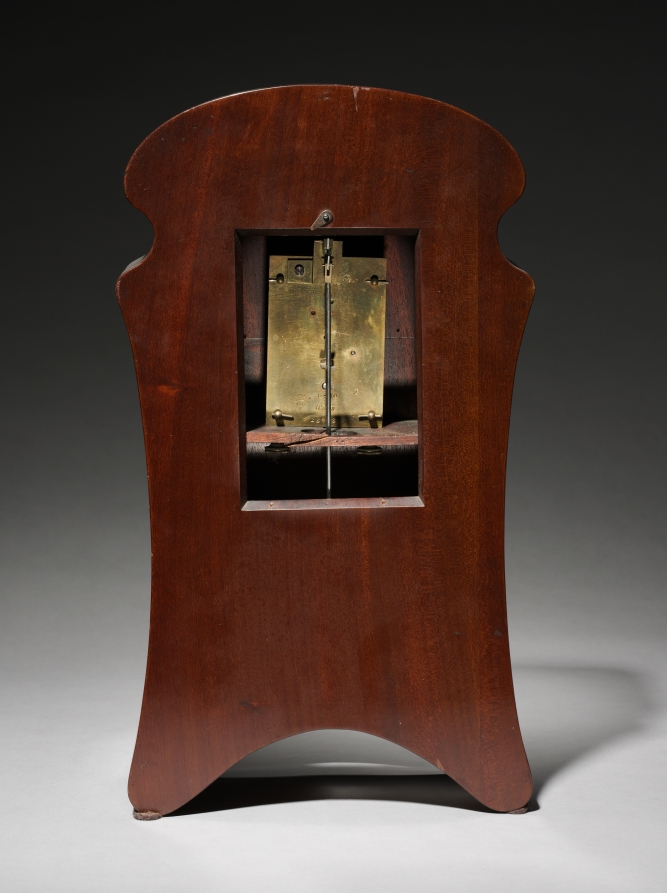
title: Mantle Clock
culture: America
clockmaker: Lenzkirch Clock Factory (German)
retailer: Tiffany & Co. (America, New York, est. 1837)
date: 1901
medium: brass, mahogany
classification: Wood